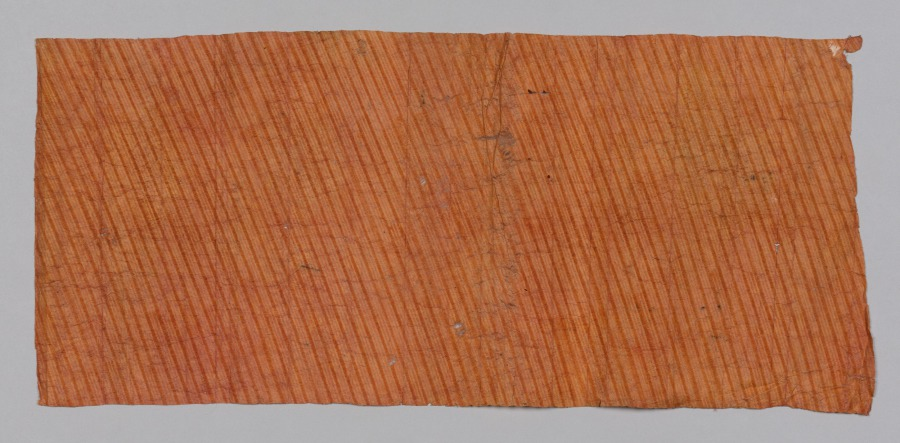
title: Tapa Cloth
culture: Oceania, Polynesia, Hawaii, 20th century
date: before 1930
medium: probably mulberry bark (Broussonetia papyrifera)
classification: Textile